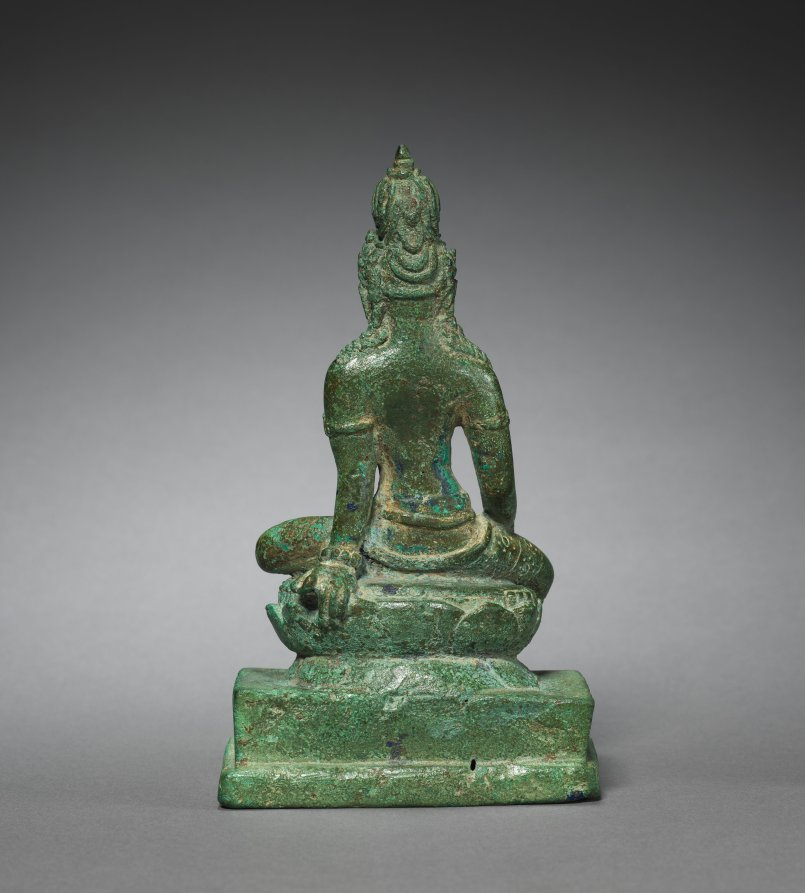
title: Avalokiteshvara (Bodhisattva of Mercy)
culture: Java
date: 800s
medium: bronze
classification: Sculpture